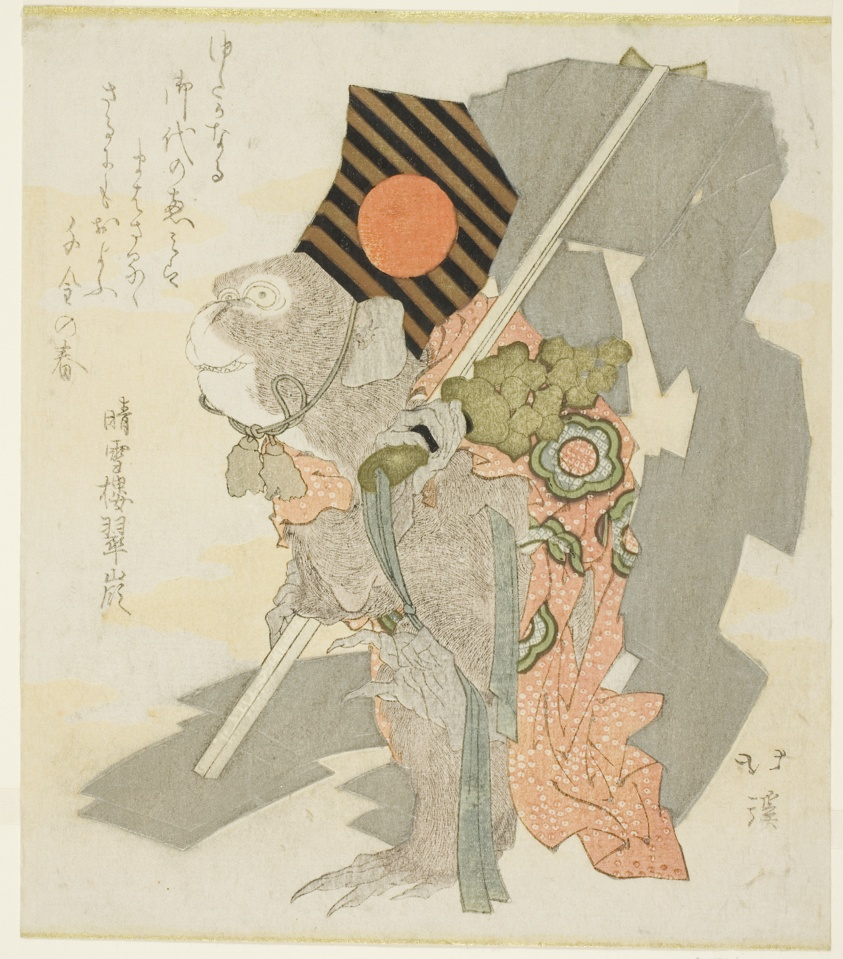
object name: Print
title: Monkey performing Sanbaso dance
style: Japanese (culture or style)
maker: Totoya Hokkei (Japanese, 1780-1850)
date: 1824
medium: Color woodblock print; shikishiban, surimono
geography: Japan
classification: woodblock print; print; asian art